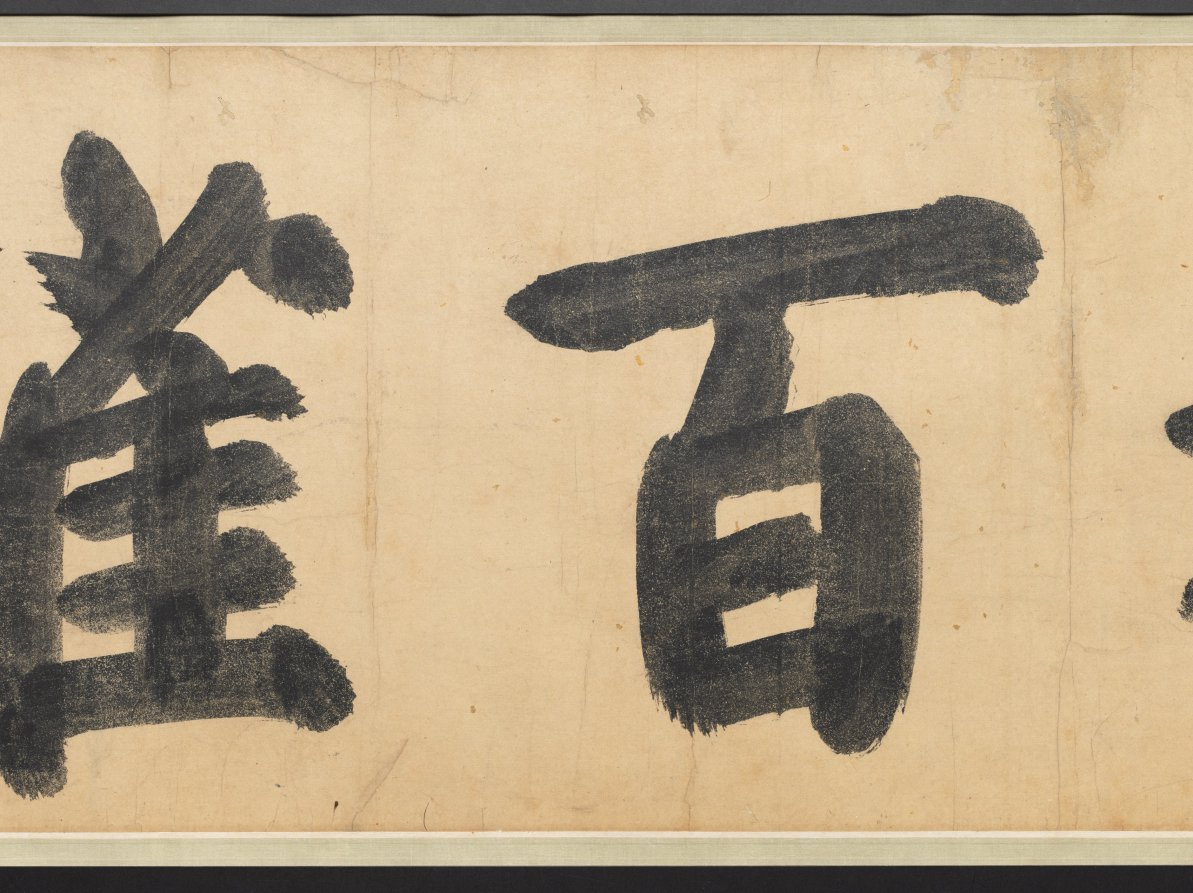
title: A Hundred Sparrows in a Lofty Grove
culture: China, Ming dynasty (1368–1644)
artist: attributed to Lin Liang (Chinese, 1416–1480)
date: 1368–1644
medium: handscroll; ink on silk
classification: Painting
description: Sparrows engaged in all kinds of activities frolic amid leafy branches, blades of grass, rocks, and a waterfall. As our eyes move over the scroll, the artist engages us in enjoying the sparrows’ carefree movements in a natural setting. The charming birds were painted from close observation in swift and fluent brushstrokes. Sparrows are a common bird and in Chinese painting they often represent the commoner in human society as opposed to the noble pheasant or peacock representative of the ruling class.